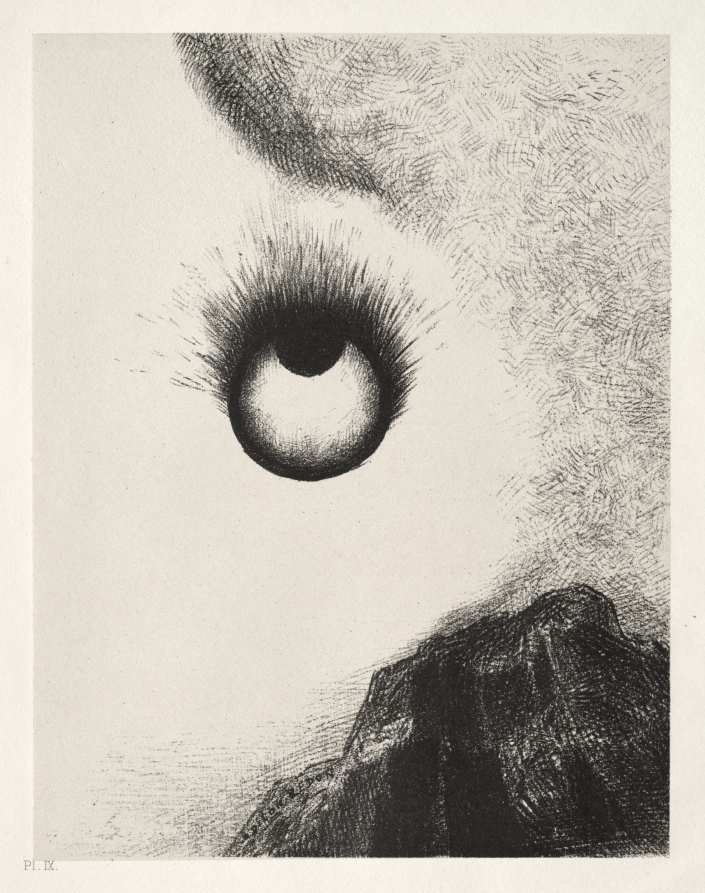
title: Everywhere Eyeballs are Aflame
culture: France, 19th century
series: The Temptation of Saint Anthony (First Series)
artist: Odilon Redon (French, 1840–1916)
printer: Becquet (French)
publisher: Edmond Deman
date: 1888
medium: lithograph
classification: Print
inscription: printed at lower left, below image: Pl. IX. / Partout des prunelles flamboient.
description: This portfolio is one of three made by Odilon Redon inspired by avant-garde writer Gustave Flaubert’s novel The Temptation of Saint Anthony (1874). Captivated by the book’s fantastical account of moralizing tests encountered by a hermit in the desert, Redon executed charcoal drawings and attempted to evoke that medium’s dense blackness in his lithographs. Based on the text’s darkly imaginative tone rather than its actual content, the works in this series present invented monsters and figures in otherworldly settings with jarring tonal variations. Although Redon felt that the prints effectively translated the surreal universe of his source material, they were largely misunderstood in his own time.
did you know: Publisher Edmond Deman commissioned this portfolio after he saw an 1886 exhibition of Redon's work in Brussels, Belgium.